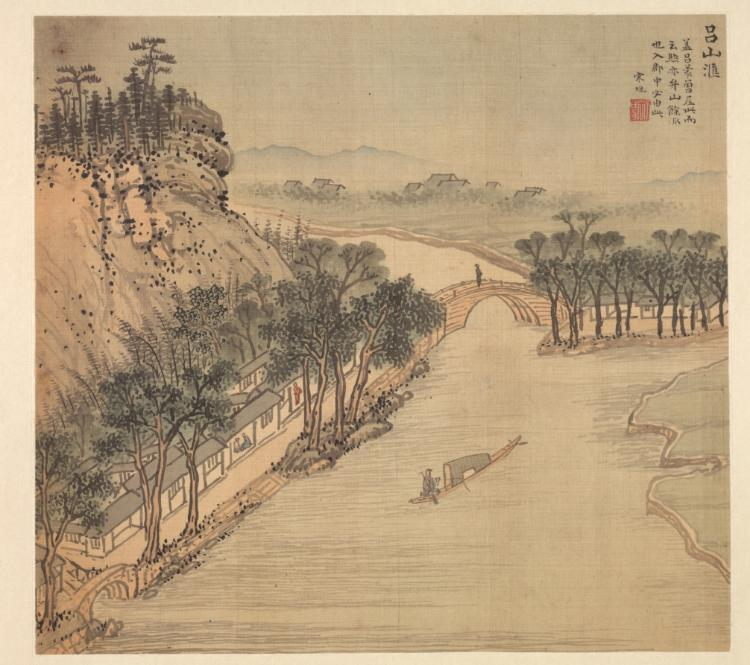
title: Lüshan Hui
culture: China, Jiaxing, Ming dynasty (1368–1644)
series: Eighteen Views of Huzhou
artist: Song Xu (Chinese, 1525-c. 1606)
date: c. 1588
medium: Album leaf; ink and color on silk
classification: Painting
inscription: 呂山滙：蓋呂蒙曾屋此而云然。亦弁山餘派也，入郡中必由此。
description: This album of landscape paintings depicts the famous scenic areas located in and around the city of Wuxing in southeastern China. These places were all known for their natural beauty, but in addition, a number were distinguished by their links to eminent historical figures and events. The artist, Song Xu, was not a native of Wuxing, but must have visited it when he accepted the commission, for he carefully depicted all eighteen views and wrote comments on each of them. Song's gazetteer-like notation on this leaf reads: Lüshan hui [Mount Lü corridor]: Its name stems from Lü Meng (178–219 CE), who camped here. It is a place in the Bian Mountain range. To get to the capital of (Wuxing) prefecture, one must follow through there.